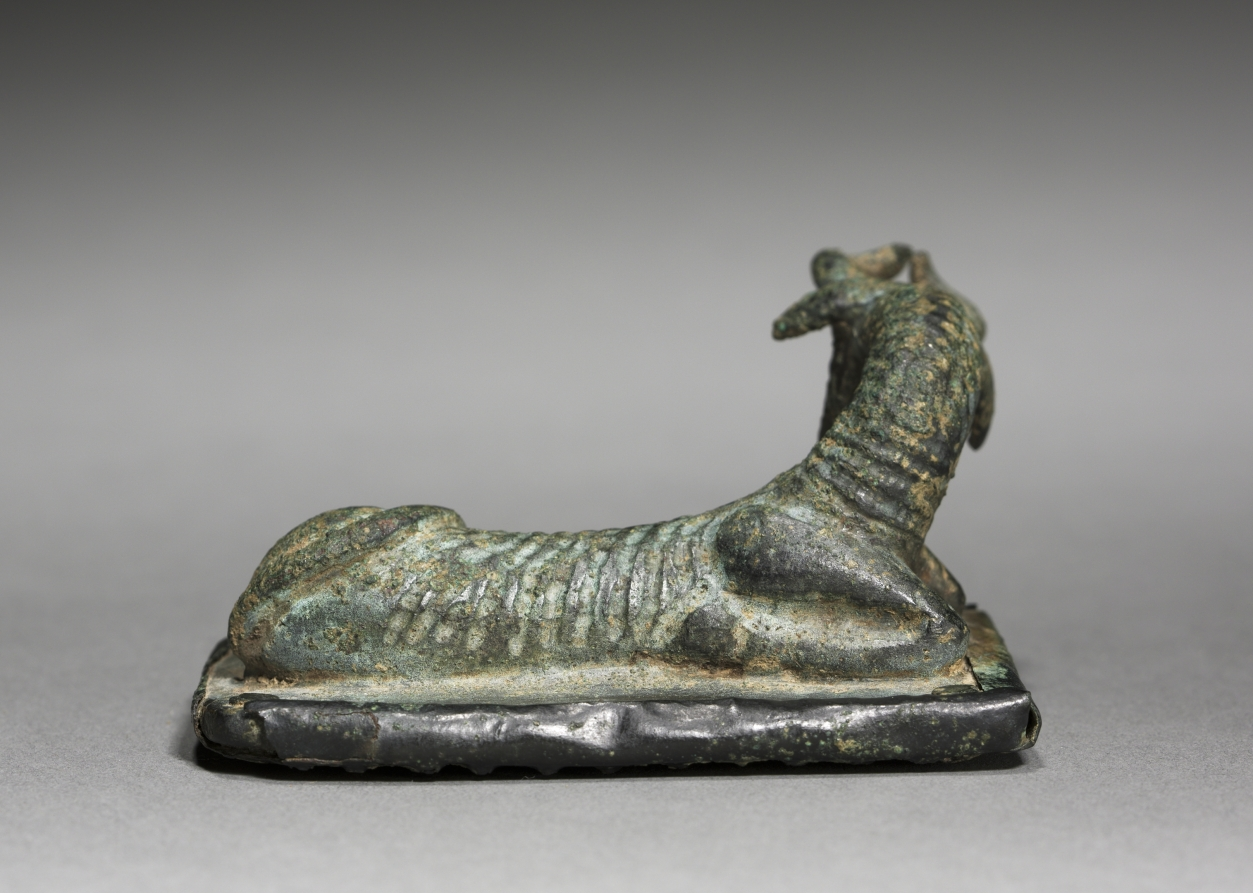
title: Recumbent Animal on Grater or Scraper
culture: Greece or Anatolia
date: 700–500 BCE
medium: bronze with iron grating plate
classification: Sculpture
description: An emaciated bull (or perhaps goat) lying on the ground, his legs tucked under in a resting position, may constitute a handle for this unusual object—likely a grater or scraper, judging from the perforated metal plate on its underside. The anatomically curious ridges across the neck and torso of the animal, as well as the large horned head turned perpendicular to the body, may have helped the owner grip the object while in use.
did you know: The exact use of this enigmatic object remains unknown.